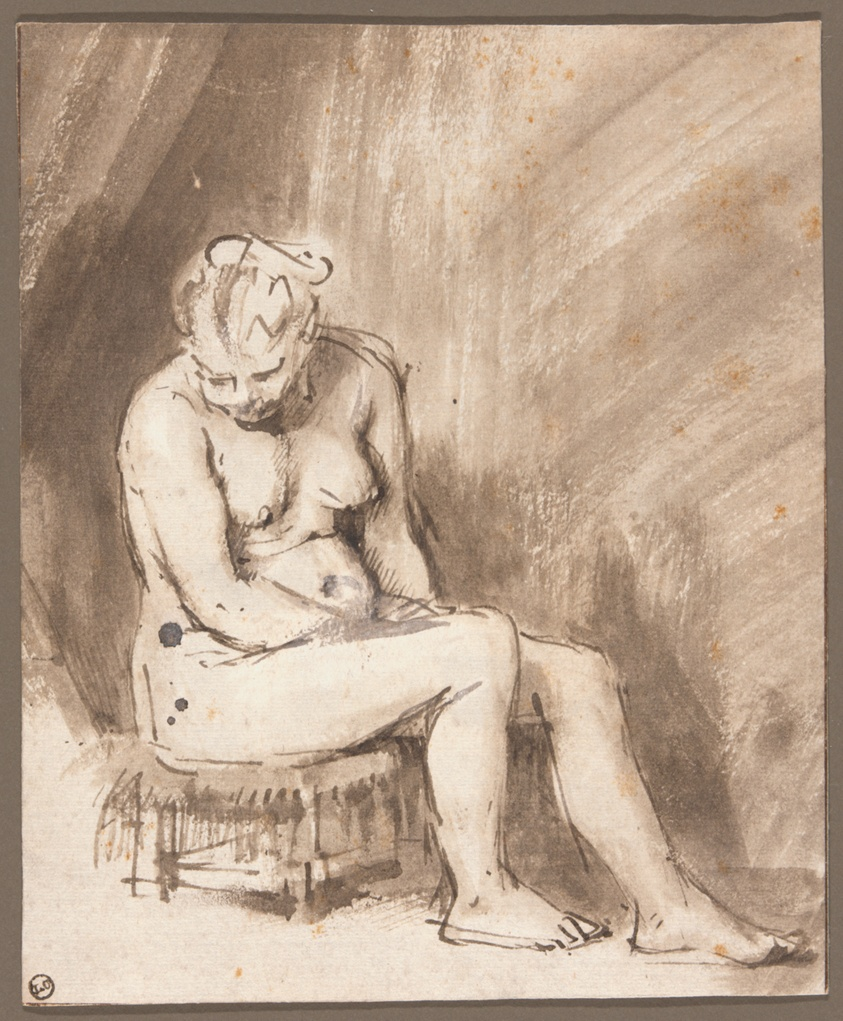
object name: Drawing and Watercolor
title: Seated Female Nude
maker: Rembrandt van Rijn (Dutch, 1606-1669)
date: 1660/62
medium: Pen and brown ink and brush and brown wash, with subtractive highlights (scraping) and touches of opaque white watercolor corrections, on ivory laid paper, laid down on cream laid card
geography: Holland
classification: pen and ink drawings; drawings (visual works); prints and drawing; paper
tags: interiors, nudes, women